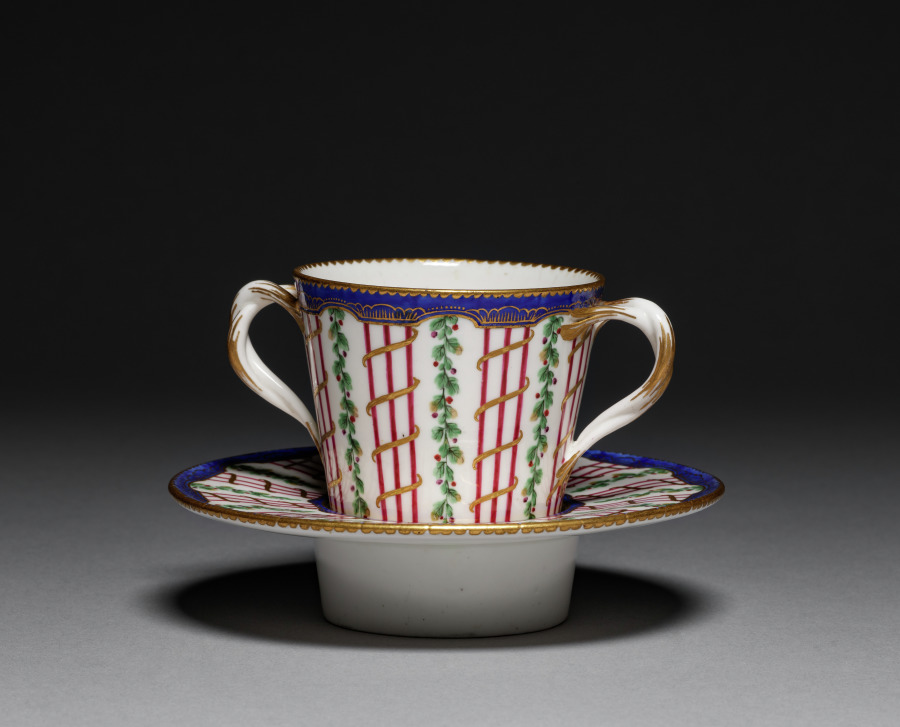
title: Cup and Saucer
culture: France, Sèvres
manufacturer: Sèvres Porcelain Factory (French, est. 1756)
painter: Louis-Jean Thévenet pere (French, 1708-)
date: 1764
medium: soft-paste porcelain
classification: Ceramic